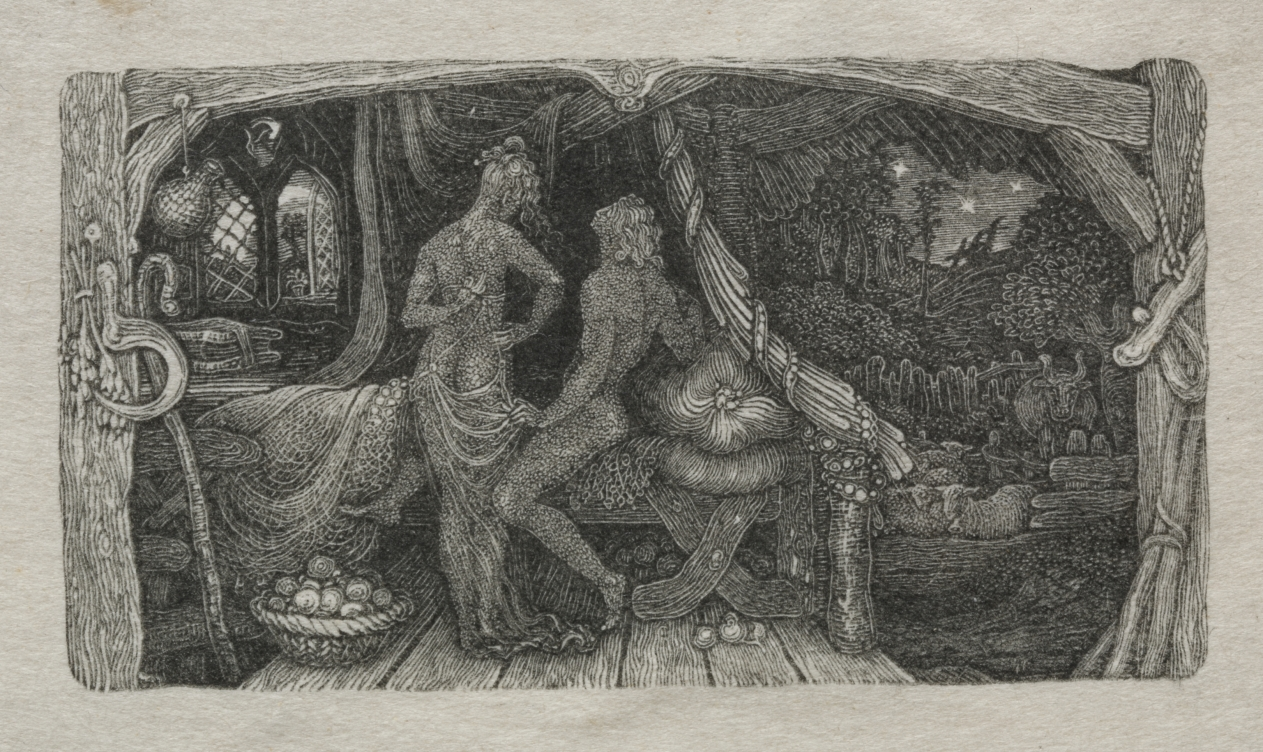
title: The Chamber-Idyll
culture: England, 19th century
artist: Edward Calvert (British, 1799–1883)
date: 1829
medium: wood engraving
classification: Print